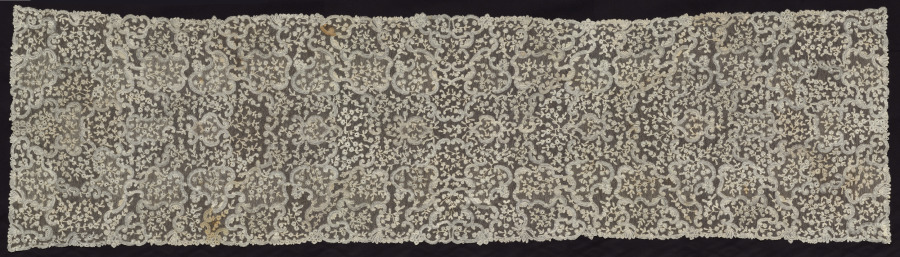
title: Lace Panel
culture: Probably Belgium, Brussels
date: 1800s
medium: linen: Duchesse(?) bobbin lace with plaited ground joining motifs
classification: Lace